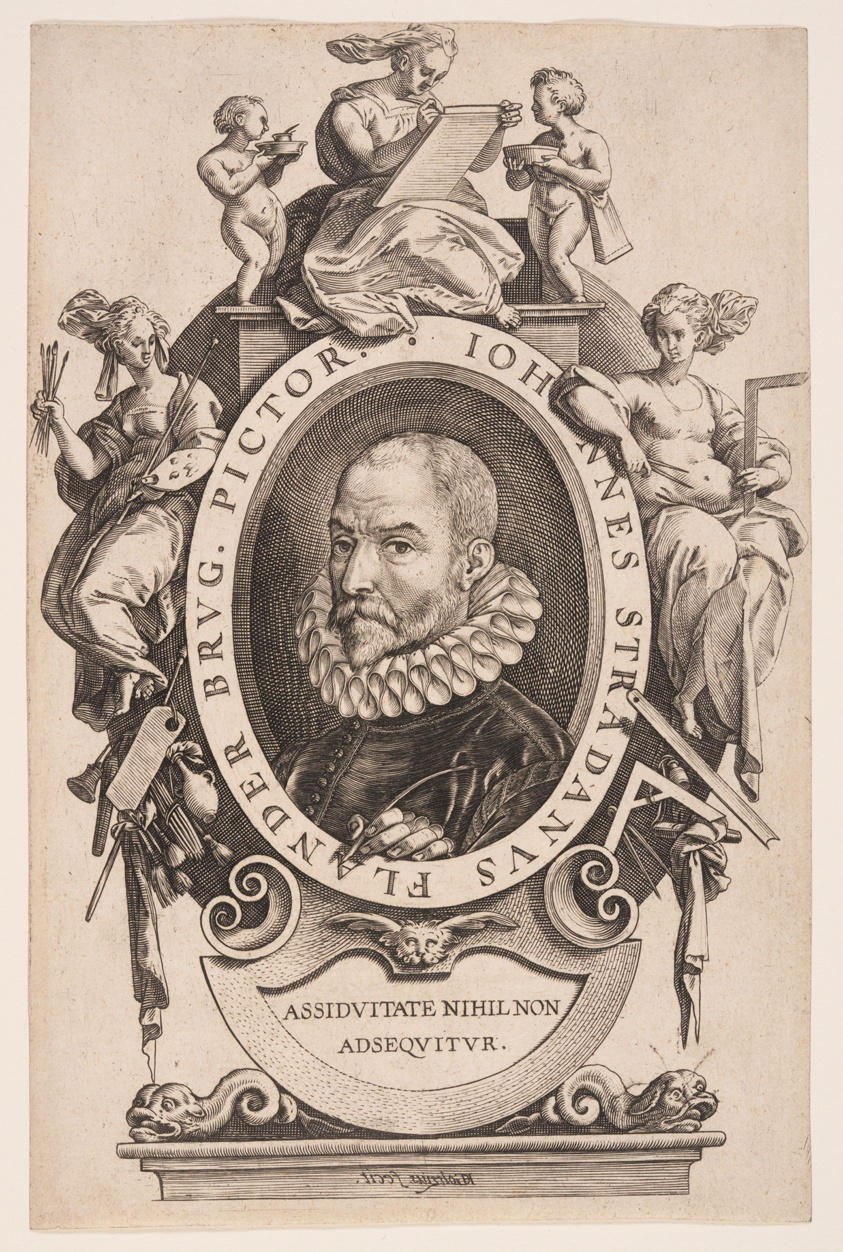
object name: Print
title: Johannes Stradanus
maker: Hendrick Goltzius (Dutch, 1558–1617)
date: 1580/90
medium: Engraving on laid paper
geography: Netherlands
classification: engraving; paper; print; prints and drawing